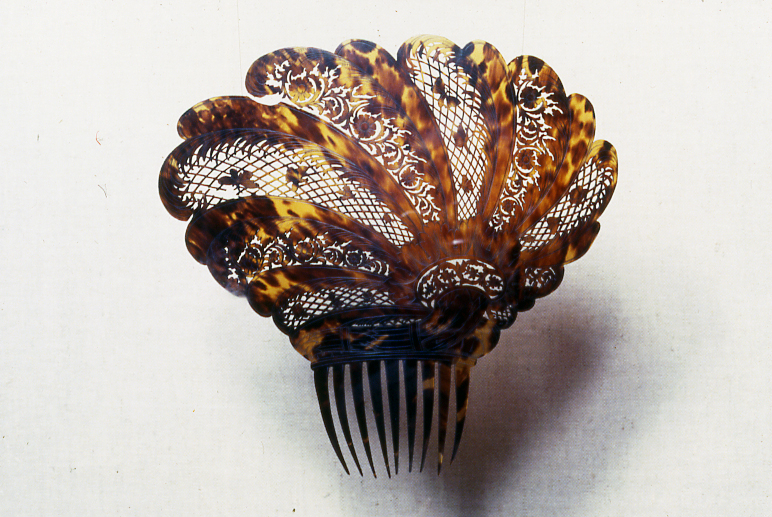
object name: Costume and Accessories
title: Comb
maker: Spain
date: c. 1885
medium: Tortoise shell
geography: Spain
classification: textile; costume accessory - comb; costume accessory; costume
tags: fashion